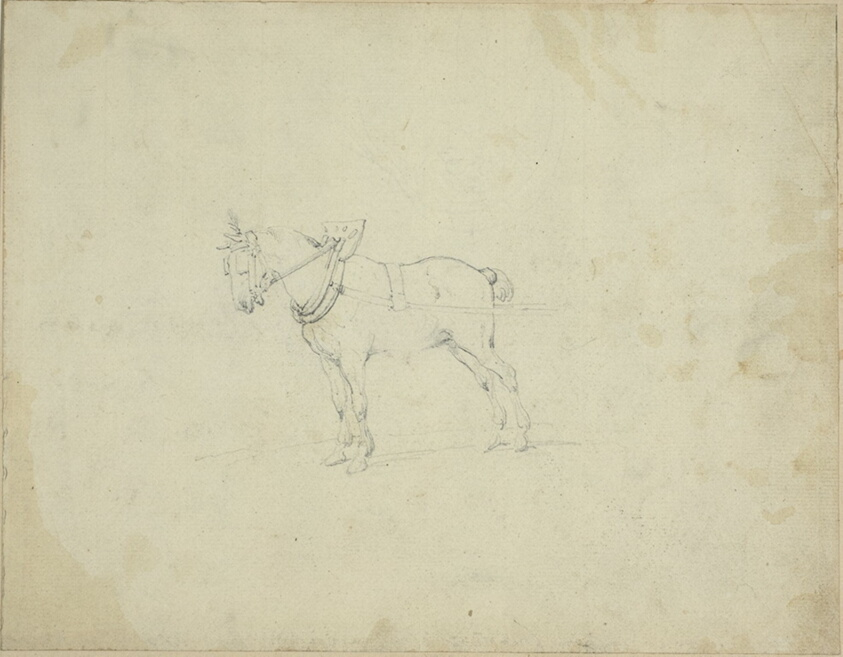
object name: Drawing and Watercolor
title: Draught Horse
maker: Jean Louis André Théodore Géricault (French, 1791-1824)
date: 1818/19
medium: Graphite on cream laid paper, perimeter mounted on cream wove paper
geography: France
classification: graphite; drawings (visual works); prints and drawing